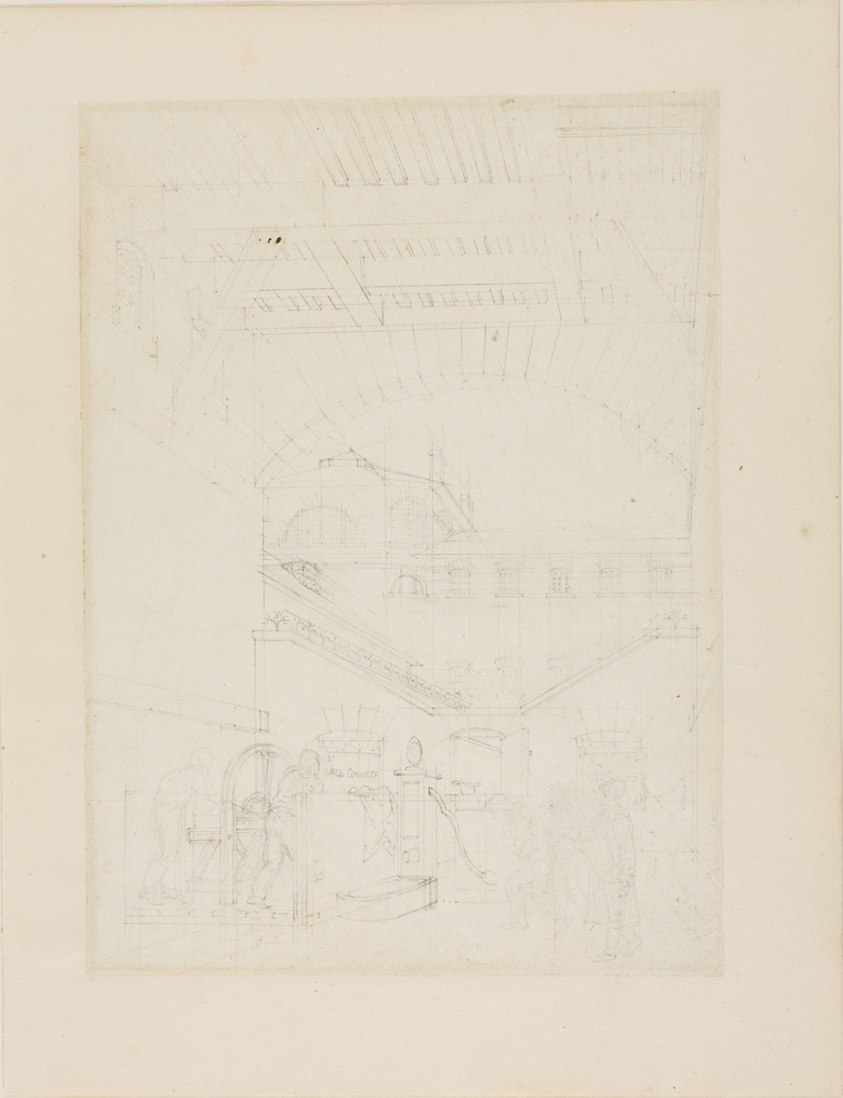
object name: Drawing and Watercolor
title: Study for Water Engine, Cold-Bath, Field's Prison, from Microcosm of London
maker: Augustus Charles Pugin (English, born France, 1762-1832); Thomas Rowlandson (English, 1756-1827)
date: c. 1808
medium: Graphite on ivory wove paper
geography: England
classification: graphite; drawings (visual works); prints and drawing